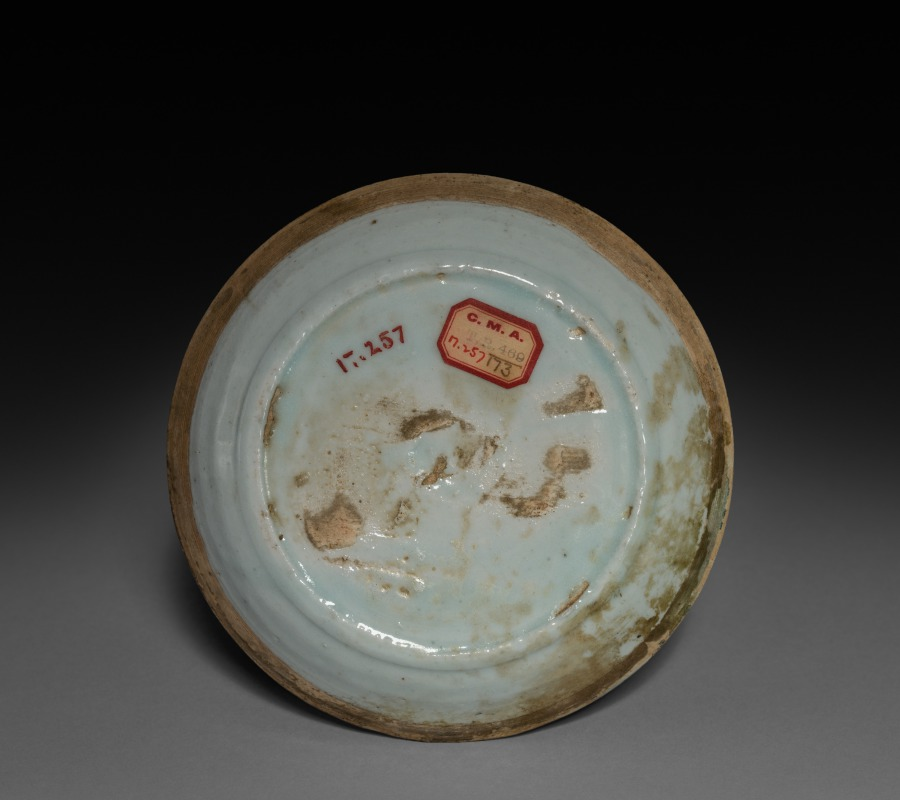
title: Saucer: Qingbai ware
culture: China, Southern Song Dynasty (1127-1279) - Yuan Dynasty (1271-1368)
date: 1200s-1300s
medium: porcelain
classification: Ceramic